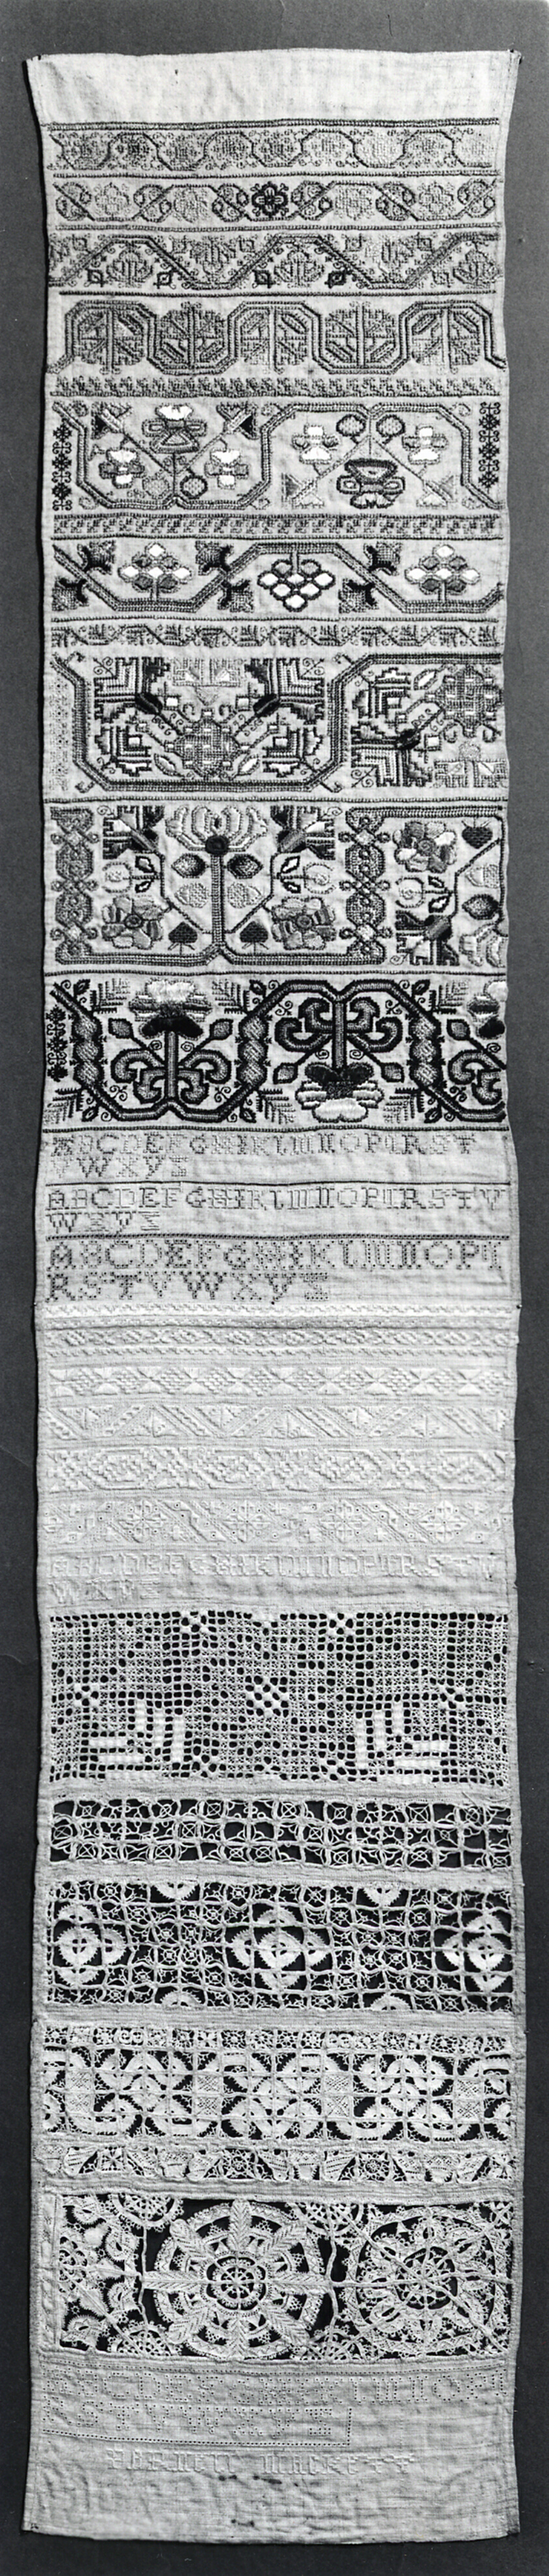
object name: Textile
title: Sampler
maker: Stitched by Parnell Mackett (English, active c. 1690); England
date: 1690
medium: Linen, plain weave; bands of cut and drawn thread work in darning, interlocking lace, satin, and needle lace filling stitches; bands of needle lace or a cut and drawn thread grid and bands embroidered with silk and linen in Algerian eye, back, cross, long-armed cross, two-sided Italian cross, double running, running, satin and a variety of buttonhole stitches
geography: England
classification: textile; needlework (visual works); sampler